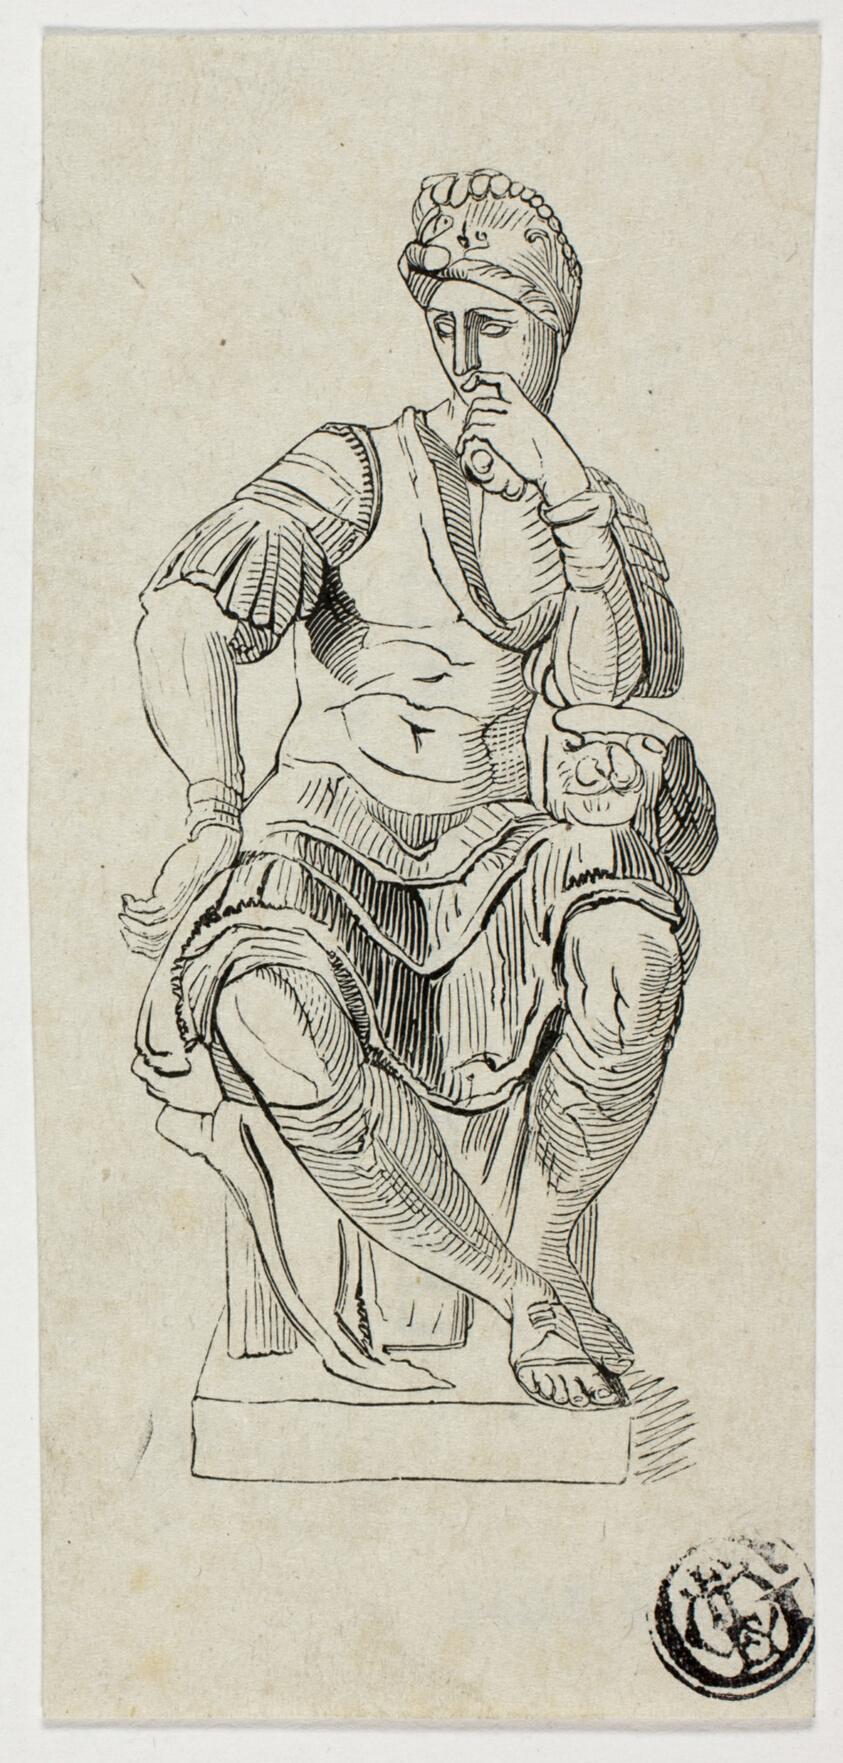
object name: Drawing and Watercolor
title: Il Penseroso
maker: Artist Unknown; Likely European, 18th century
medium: Pen and ink on paper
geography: Europe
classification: pen and ink drawings; drawings (visual works); prints and drawing